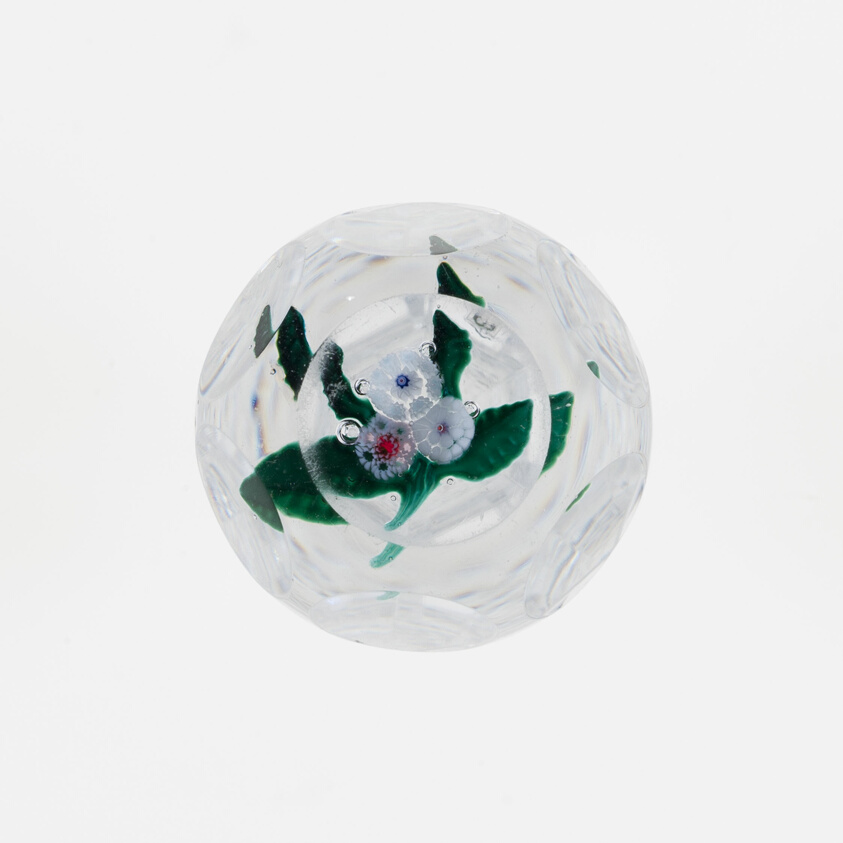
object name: Glass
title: Seal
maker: Gilliland Glass Manufactory (American, founded 1820)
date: c. 1880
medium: Glass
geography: New York City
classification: paperweight; lampwork; glass; european decorative arts